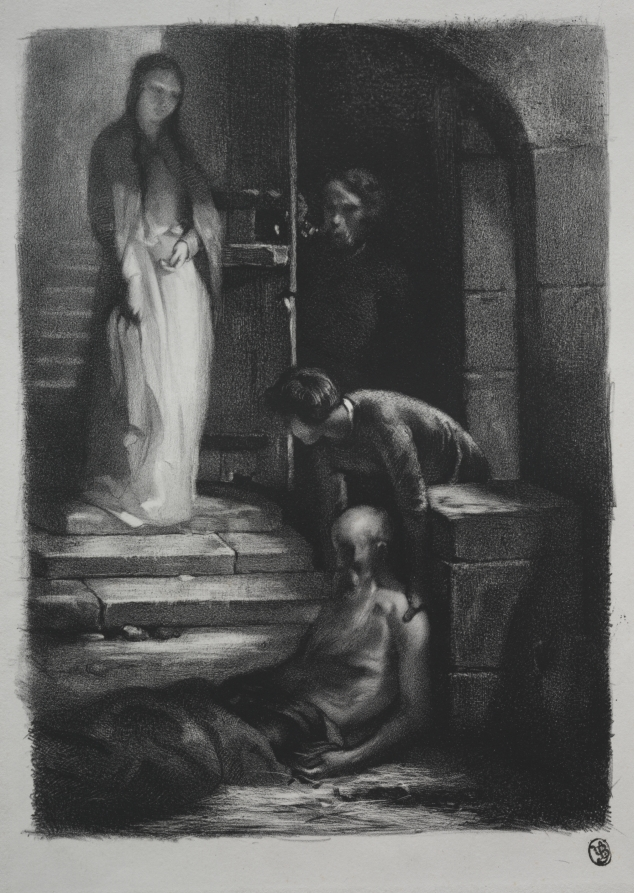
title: The Prisoner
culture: France, 19th century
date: 1800s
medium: lithograph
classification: Print